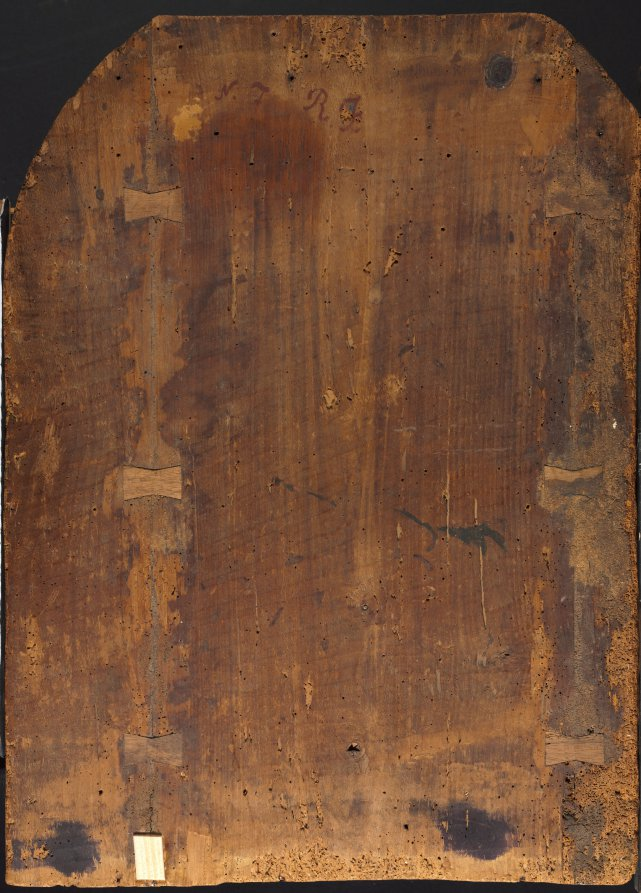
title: Icon of the Mother of God and Infant Christ (Virgin Eleousa)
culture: Republic of Venice, Kingdom of Candia, Candia (Heraklion, Crete, Greece) or Byzantine Empire, Constantinople (Istanbul, Turkey)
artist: attributed to Angelos Akotantos (Cretan, died 1450)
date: c. 1425–50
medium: tempera and gold on wood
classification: Painting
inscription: None visible on obverse; unidentified inscriptions on reverse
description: This large icon of a tender embrace between the Virgin Mary and Christ likely hung on a Greek Orthodox church’s iconostasis, a screen separating the congregation from the altar-containing sanctuary, which only clergy could enter. A skilled painter of faces and draperies, Angelos Akotantos was among Crete’s most sought-after artists. Based in Byzantium’s artistic center in his hometown of Candia, he painted for imperial clients and beyond. Despite theological differences, Cretan icons of Mary were popular in Ethiopia. In the early 1500s, Emperor Lebna Dengel sent monks Zekre and Pawli to acquire Cretan icons for him. Twenty-nine Cretan icons are still venerated (honored) in Ethiopian churches.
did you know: This is the only known work by Angelos Akotantos in the United States.